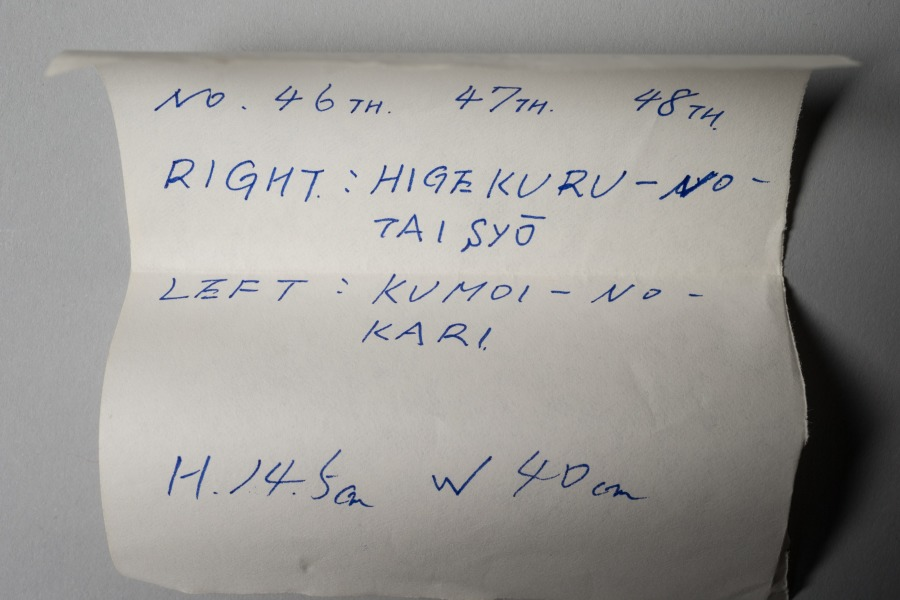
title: Section of an Illustrated Tale of Genji Poetry Contest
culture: Japan, Muromachi period (1392–1573)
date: 1400s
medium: section of a handscroll mounted as a hanging scroll; ink on paper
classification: Painting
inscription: 四十六番 左 ひげくろの大将 心さえ空にみだれし雪の［も」夜に ひとりさえつるかたしきの袖／ 四十七番 うきことを思ひさわ げばさまざまに くゆるけむりぞ いとど たち そふ／ 四十八番 すがくれてかず にも あらぬ かりのこを いづかたにかはとりかくすべき／ 右 雲井のかり かぎりとてわすれがたきを わするるも こや世に なびくこころな るらむ／ あさきなを いひ ながしける かわ ぐちは いかが もらしし せきのあらがき／ あわれをもいかに しりてか なぐさ めむ あるや 恋しき なきや かなしきに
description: This hanging scroll was once part of a handscroll depicting a waka (thirty-one syllable verse) poetry contest between characters from the 11th-century literary classic Tale of Genji. In this section, a woman known informally as Kumoi no kari, or “Goose in Fog,” after a lovelorn line she hums in the novel, is pitted against Higekuro no taishō, or “General Blackbeard.” Three of his poems, numbered 46 to 48, from “The Handsome Pillar” chapter appear over his image. The subsequent three poems inscribed above Kumoi no kari are presented as her “responses,” and come from "The Plum Tree Branch", “New Wisteria Leaves”, and "Evening Mist" chapters.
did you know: General Blackbeard laments having smelly ash poured upon him by his angry wife in one of the poems.